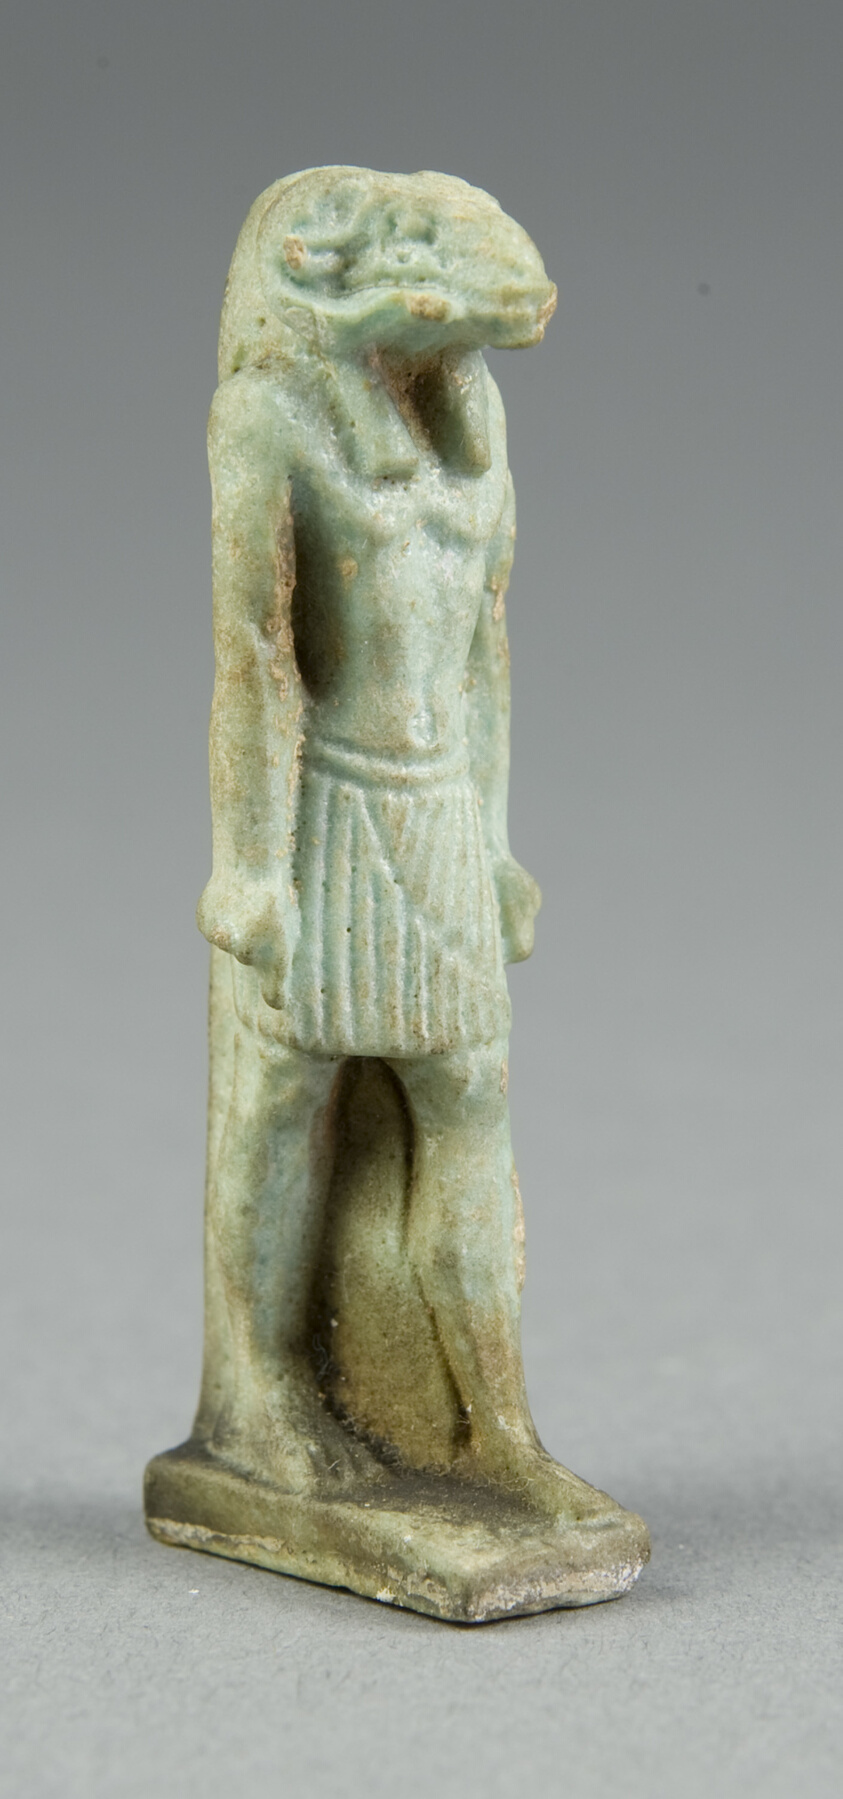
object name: Costume and Accessories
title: Amulet of the God Khnum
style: third intermediate period, egyptian, ancient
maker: Egyptian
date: Third Intermediate Period, Dynasty 21–25 (1070–656 BCE)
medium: Faience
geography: Egypt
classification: amulet; jewelry; ceramics; ancient art; costume; faïence (composite material)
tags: gods (deities), deities, ram